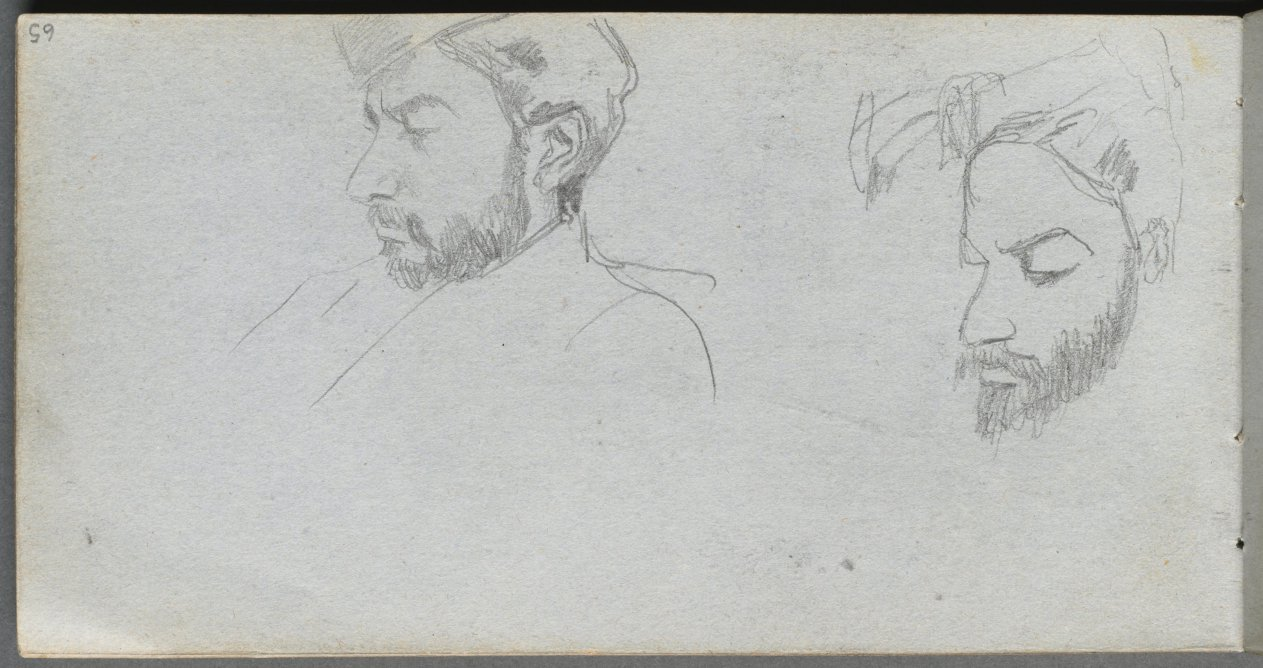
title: Sketchbook, page 65: Study of Faces in Profile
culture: France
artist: Ernest Meissonier (French, 1815–1891)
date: c. 1860s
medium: graphite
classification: Bound Volume